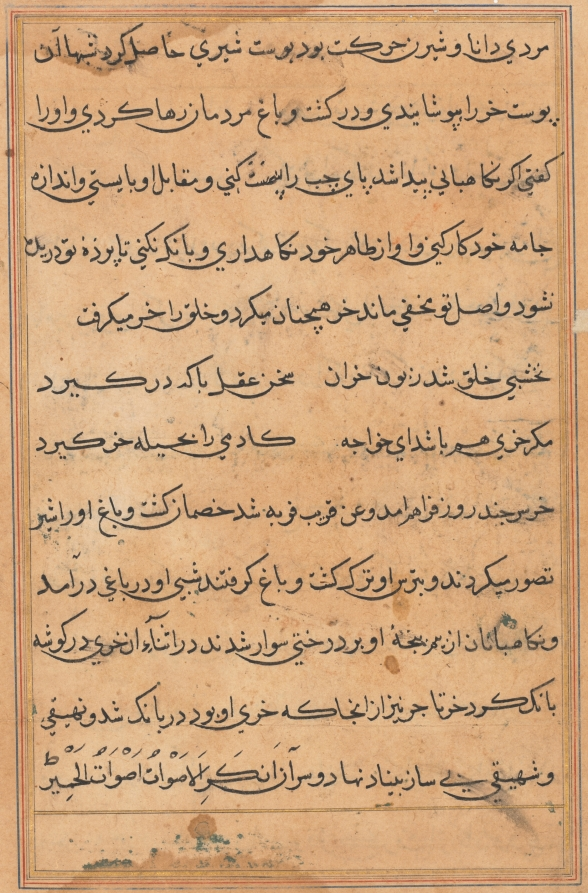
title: Page from Tales of a Parrot (Tuti-nama): text page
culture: Mughal India, court of Akbar (reigned 1556–1605)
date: c. 1560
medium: gum tempera, ink, and gold on paper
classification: Painting